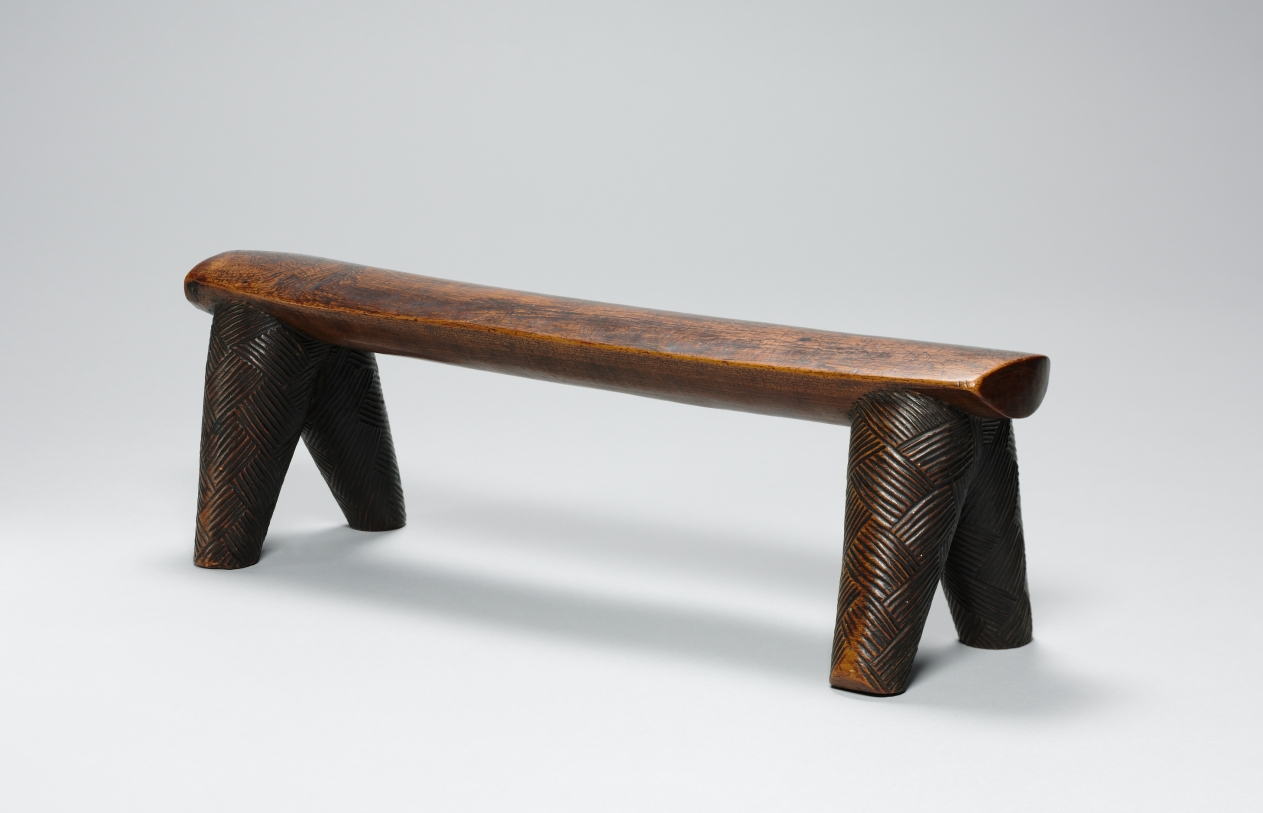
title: Headrest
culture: Africa, Southern Africa, South Africa, Zulu-style carver; Africa, Southern Africa, South Africa, Kingdom of Eswatini, Swazi-style carver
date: 1800s–1900s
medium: Wood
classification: Furniture and woodwork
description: The shape of this four-legged headrest alludes to cattle, whether bull, ox, or cow. This reference services from the fact that these animals are a source of wealth but also act as mediators between the living and the dead. In earlier days, both headrests and cattle were used in dowry transactions.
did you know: Headrests served to protect the elaborate coiffures highly fashionable until the early to mid-20th century and also enhanced contact with the ancestral realm through dreams.